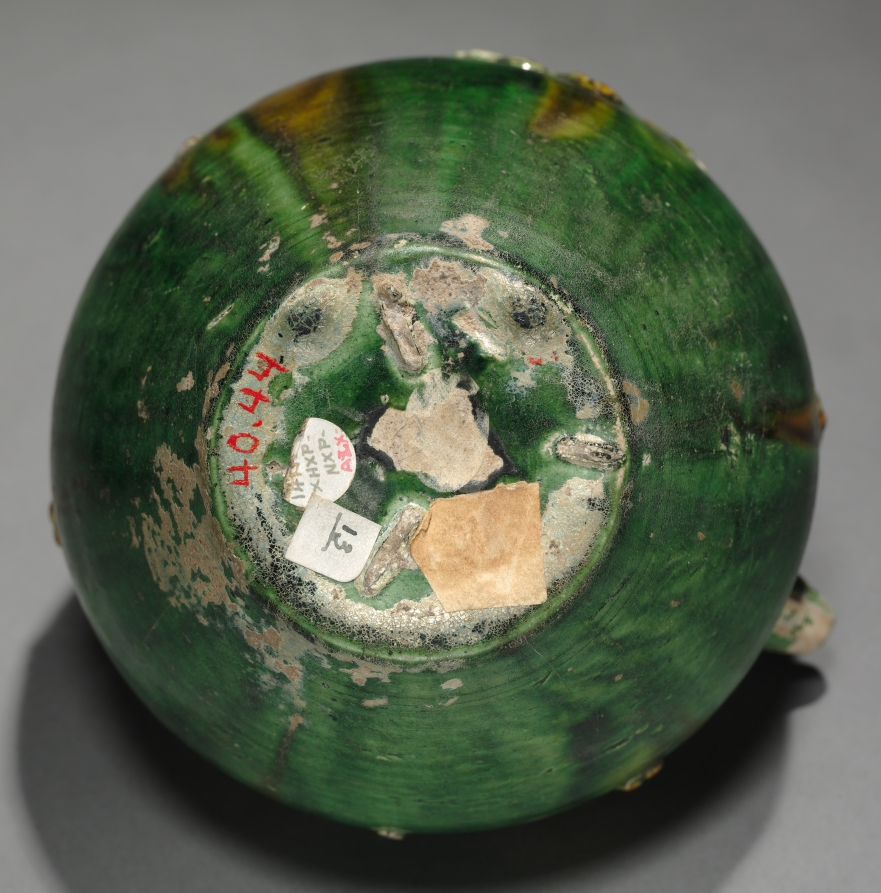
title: Jar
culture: China, Tang dynasty (618-907)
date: late 600s–700s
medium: pottery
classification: Ceramic